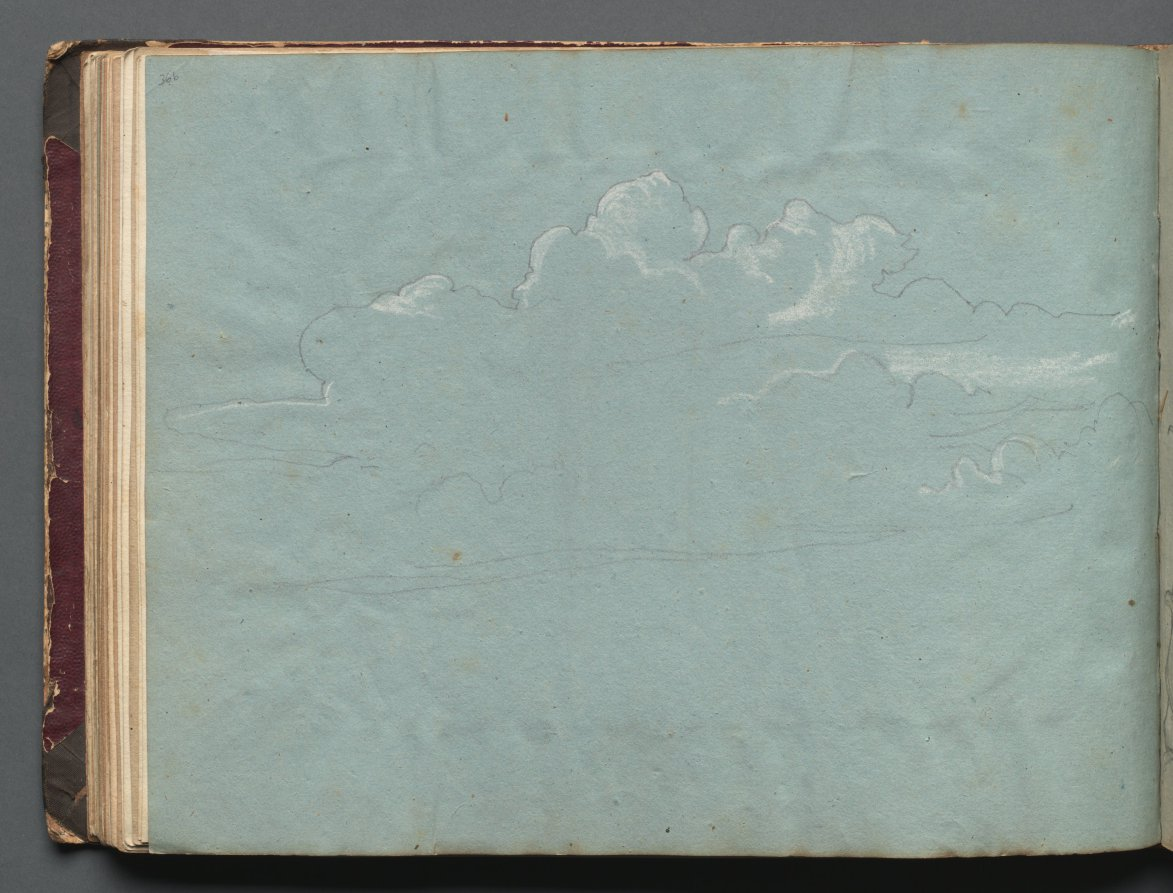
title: Album with Views of Rome and Surroundings, Landscape Studies, page 36b: Cloud Study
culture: Germany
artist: Franz Johann Heinrich Nadorp (German, 1794–1876)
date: c. 1830s-70s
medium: graphite with white heightening on blue paper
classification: Bound Volume